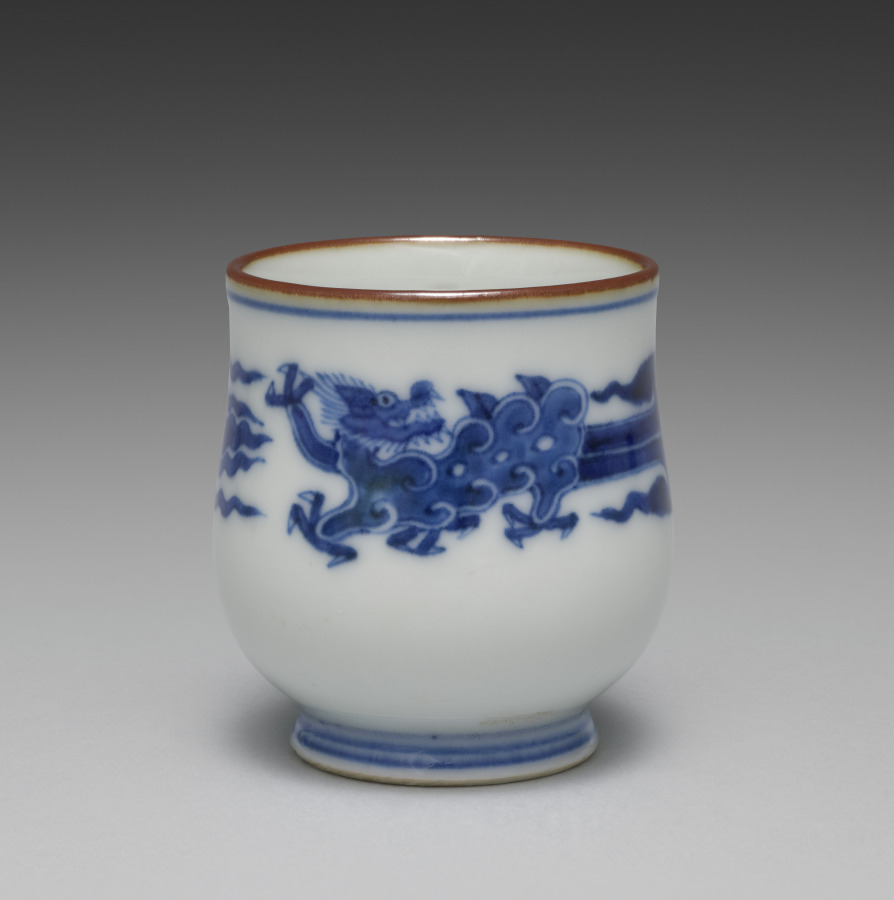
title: Cup from Sake Cups with Dragons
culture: Japan, Meiji period (1868–1912)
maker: Seifū Yohei III (Japanese, 1851–1914)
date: c. 1893–1914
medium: One from a set of six sake cups; porcelain with underglaze blue and iron oxide rims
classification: Ceramic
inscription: 大日本清風造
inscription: 清風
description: Each of these sake cups pictures two backward-looking dragons. The highly stylized creatures resemble jade carvings.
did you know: Seifū Yohei III was inspired by the Chinese mythical animals that were common on porcelain objects made at Jingdezhen in China during the Ming dynasty (1368–1644) and then exported around the world.